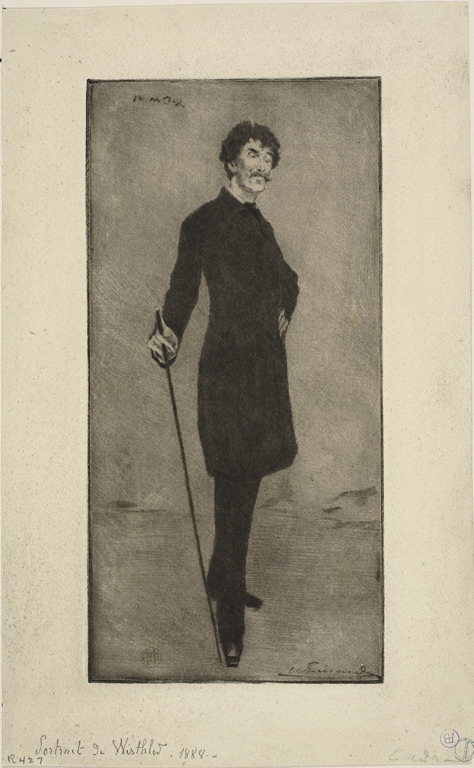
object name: Print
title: Portrait of Whistler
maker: Henri Charles Guérard (French, 1846-1897); after William Merritt Chase (American, 1849-1916)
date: c. 1888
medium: Etching, drypoint, roulette and aquatint on light green wove paper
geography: France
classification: etching; print; prints and drawing